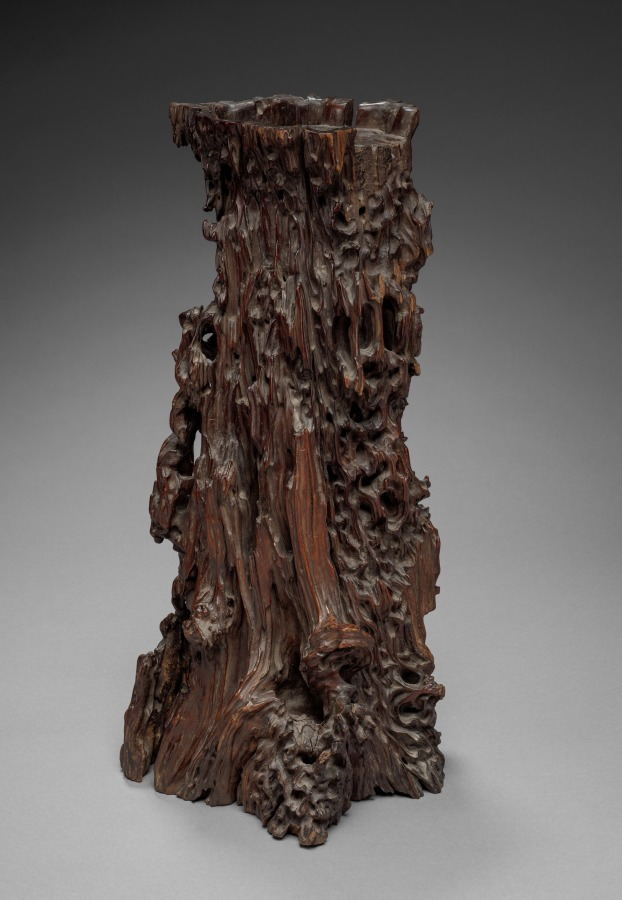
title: Prunus Wood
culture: China, Qing dynasty (1644-1911)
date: 1700–1899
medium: wood carving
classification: Wood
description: The gnarled and twisted form of a prunus stump is carved to accentuate its naturally textured surface. The body is finely polished to create a lustrous patina. Simple wood carvings like this exemplify the Chinese scholars’ taste for natural forms and rustic materials, which in turn reflect the desire to retreat into nature. They were collected and displayed as decorative works of art in the traditional scholars’ studios.